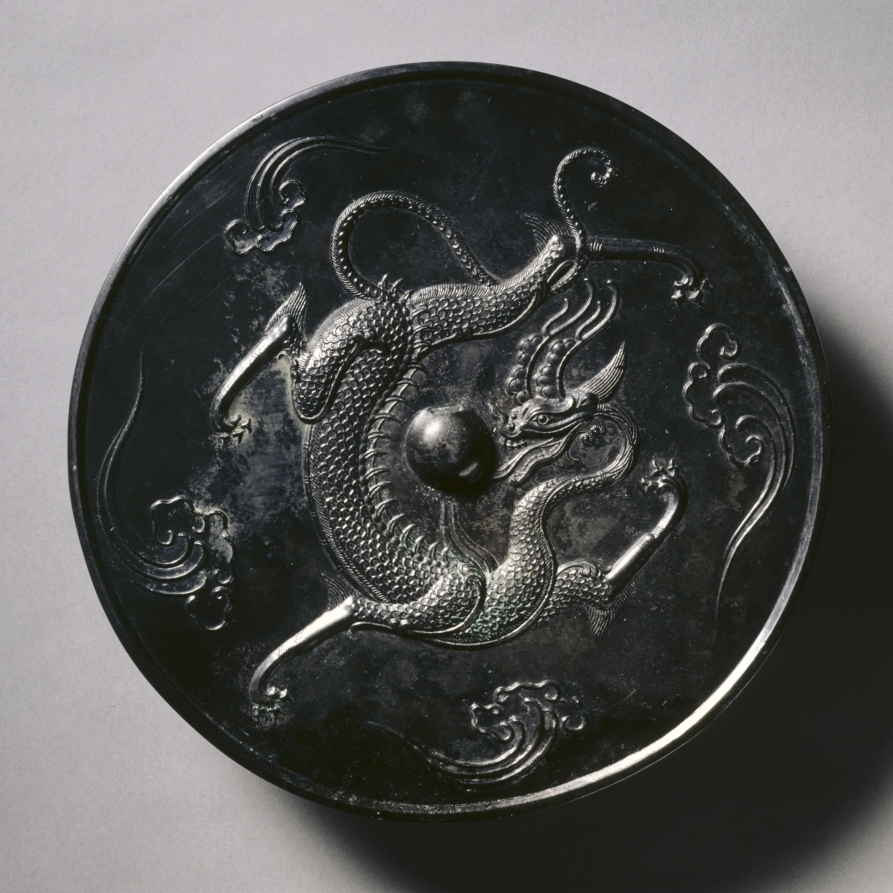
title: Mirror with a Coiling Dragon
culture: China, Tang dynasty (618-907)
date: 700s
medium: bronze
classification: Metalwork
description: Cast in high-tin and low-lead bronze by the lost wax method, this mirror has a dark and lustrous patina known as heiqigu (literally, “black lacquer antique”). It bears a design of a coiling dragon among trailing clouds. With a small, elongated head connecting to an S-curve of the neck that is as sinuous as the body and tail, the dragon of the Tang period is unique.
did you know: The patina of this mirror is known as heiqigu (literally, “black lacquer antique”).